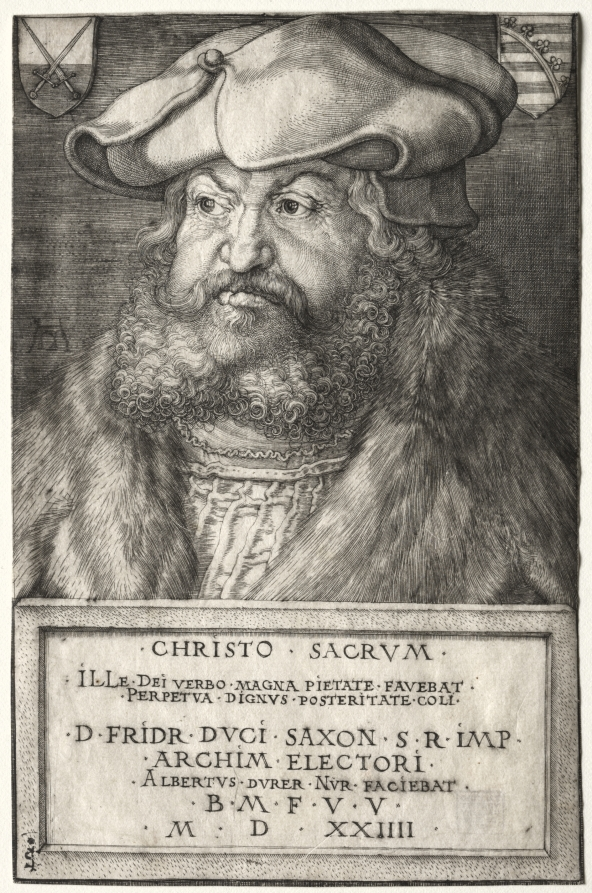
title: Frederick the Wise, Elector of Saxony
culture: Germany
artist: Albrecht Dürer (German, 1471–1528)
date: 1524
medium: engraving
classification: Print